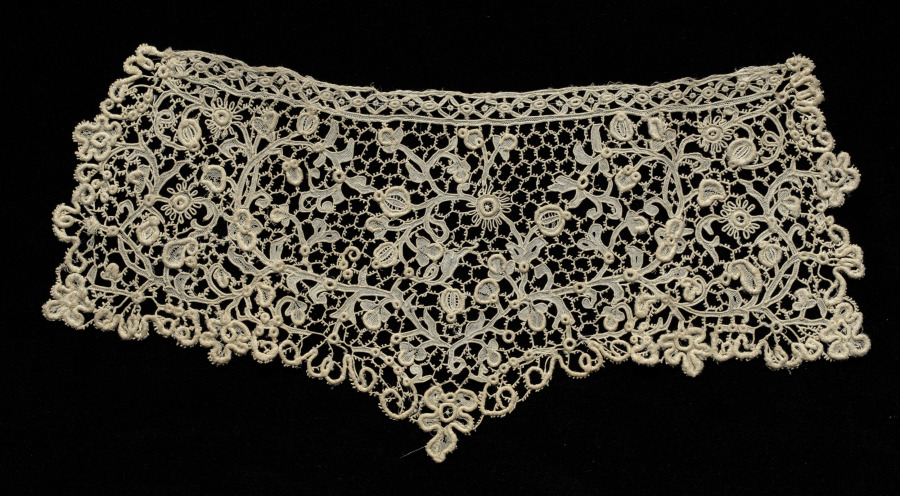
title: Lace Cuff (One of a Pair)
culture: Italy, Venice, 1600s-1700s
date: 1600s–1700s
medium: linen: needle lace (Venetian Rose Point)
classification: Lace